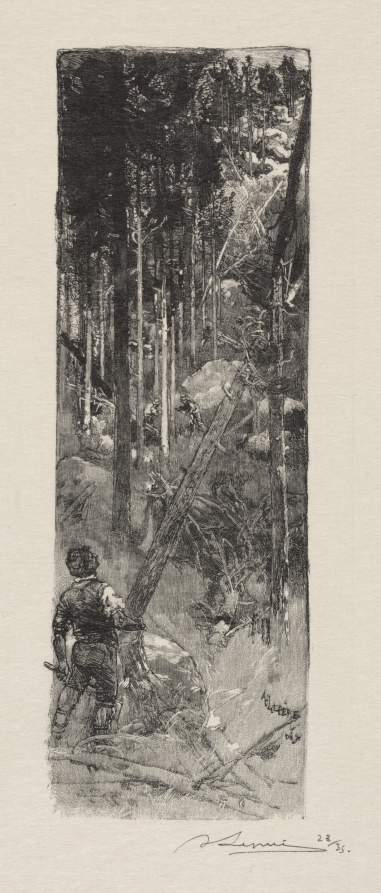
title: Abattage des Pins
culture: France, 19th century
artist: Auguste Louis Lepère (French, 1849–1918)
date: 1887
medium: wood engraving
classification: Print